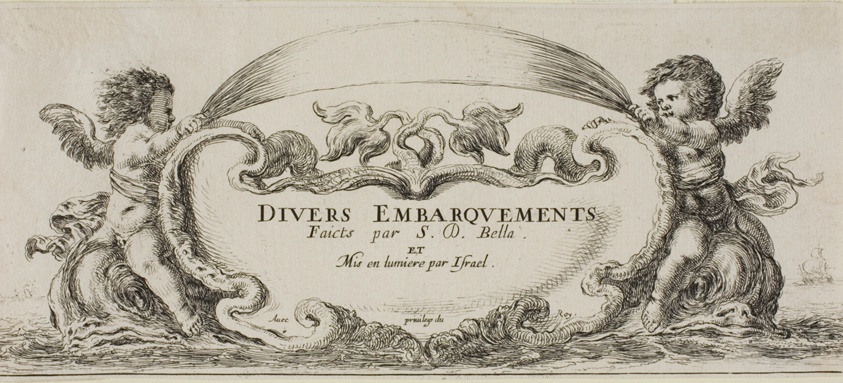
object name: Print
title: Frontispiece to Various Embarkments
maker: Stefano della Bella (Italian, 1610-1664)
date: c. 1640-1650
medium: Etching on ivory laid paper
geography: Italy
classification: etching; print; prints and drawing